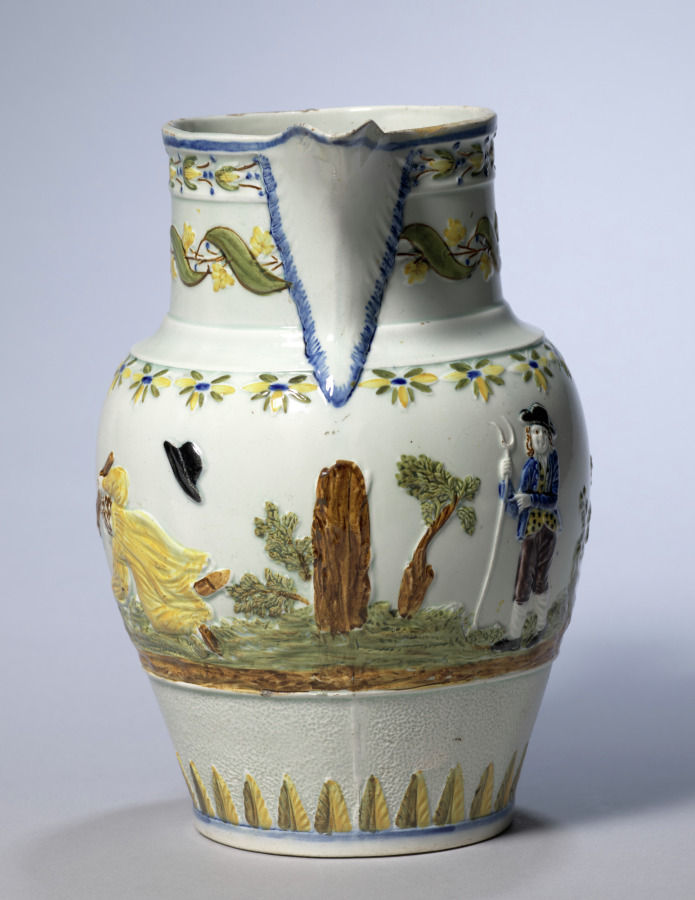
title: Jug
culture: England, Staffordshire, late 18th-early 19th Century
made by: Staffordshire Factory (British)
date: c. 1800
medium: earthenware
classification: Ceramic